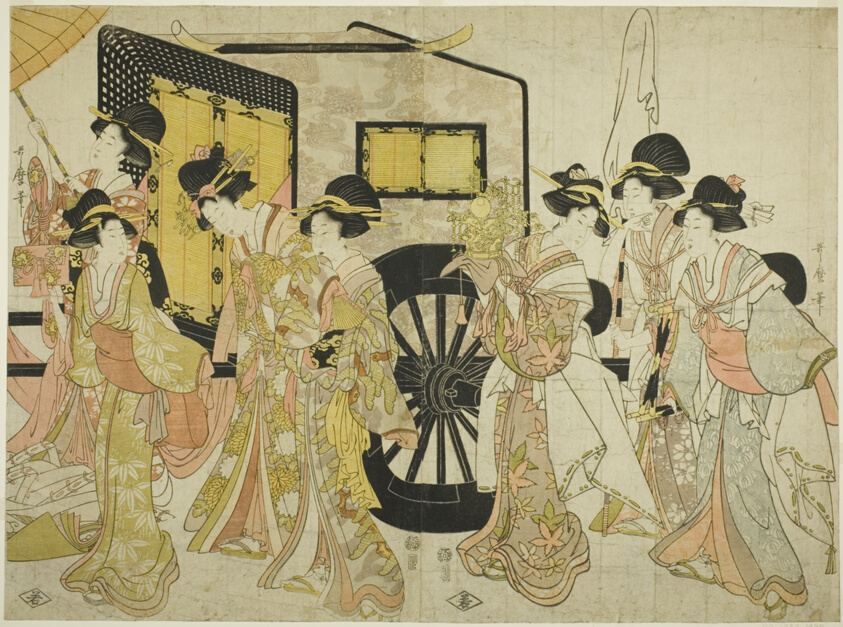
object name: Print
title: Women Imitating an Imperial Procession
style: Japanese (culture or style)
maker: Kitagawa Utamaro 喜多川 歌麿; Japanese, 1753 (?)-1806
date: 1805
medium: Color woodblock print; two sheets of oban triptych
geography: Japan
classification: woodblock print; print; asian art